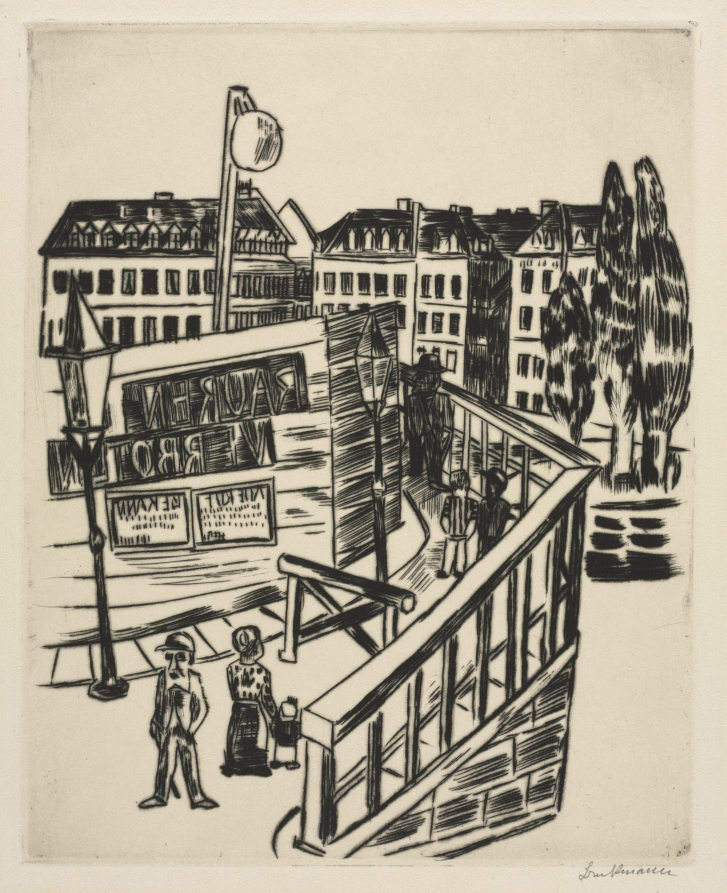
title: Wooden Bridge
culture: Germany, 20th century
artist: Max Beckmann (German, 1884–1950)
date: 1922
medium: drypoint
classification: Print